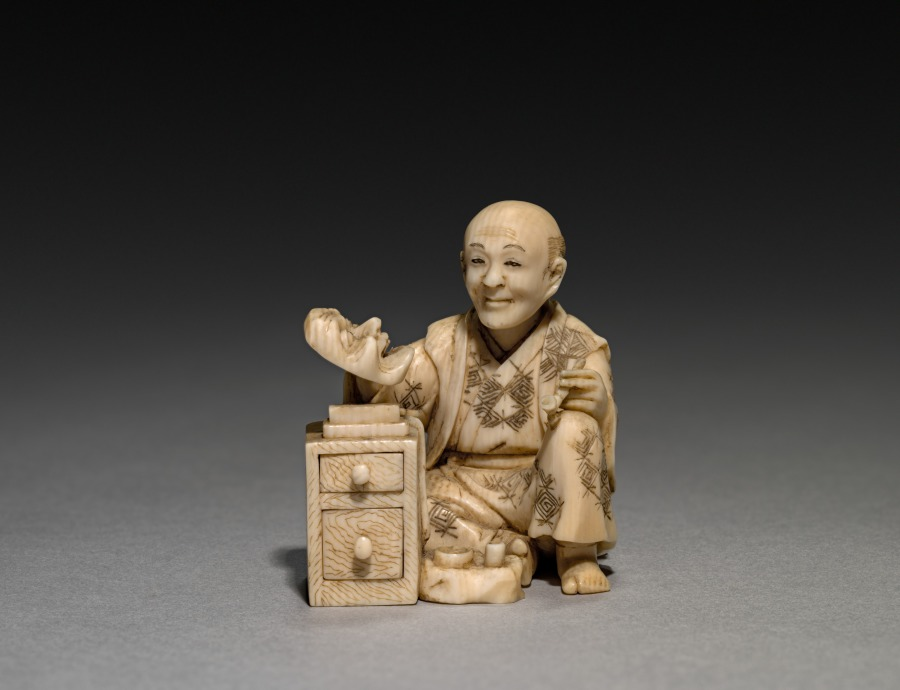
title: The Mask Maker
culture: Japan, Meiji period (1868–1912)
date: late 1800s to early 1900s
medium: ivory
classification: Ivory